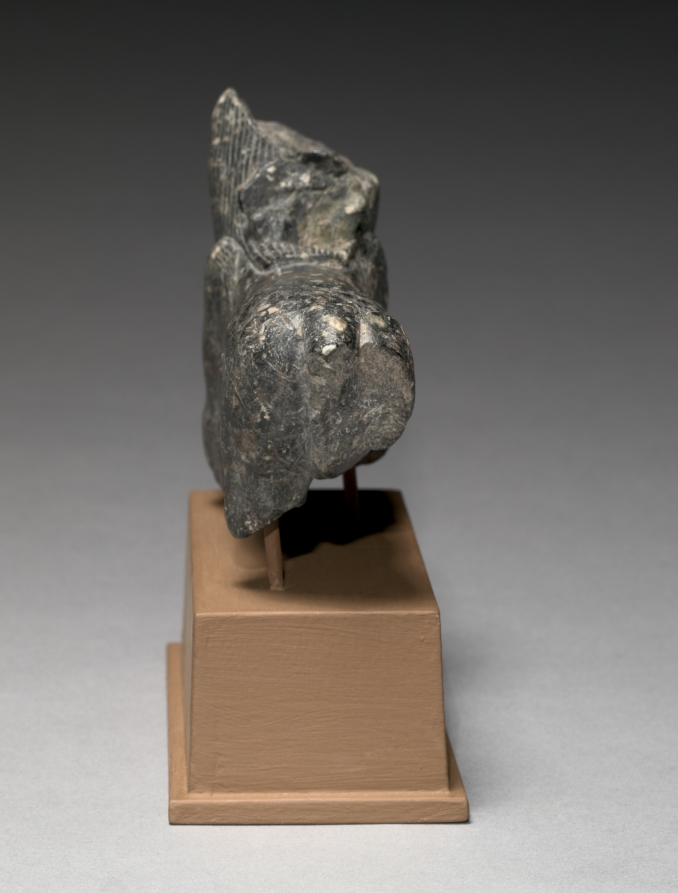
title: Tutu as Sphinx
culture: Egypt, Greco-Roman period (332 BCE–395 CE), Ptolemaic dynasty (305–30 BCE)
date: 150 BCE–30 CE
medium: gray steatite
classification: Sculpture